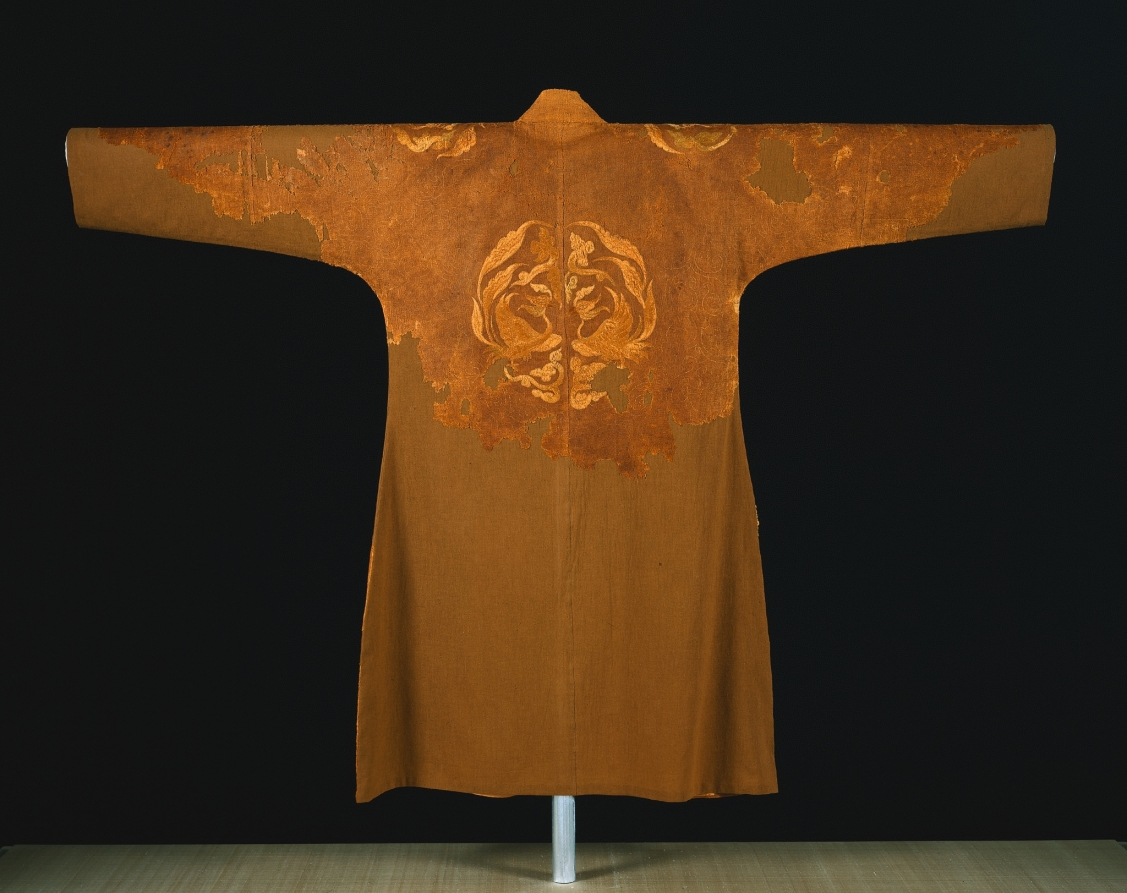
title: Woman's Robe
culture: China, Liao dynasty (907-1125)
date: 907–1125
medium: Silk and gold thread: embroidery on silk gauze ground; silk lining, silk batting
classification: Garment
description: The robe is embroidered on the back with clouds and paired phoenixes (associated with female members of the imperial family). Single phoenixes and clouds occur at the shoulders. On the front, fragments of another large pair of phoenixes remain. The birds and clouds are set against a scrolling vine pattern embroidered with gold thread, of which only the gold leaf remains. The design was drawn and then embroidered with silk and gold threads on lengths of fabric (gauze backed with silk) before they were cut and seamed. The robe was then lined with silk batting between the layers for warmth. Toward the end of the Liao dynasty, rules for wearing Khitan-style dress (overlapping toward the left) became increasingly relaxed. This may explain the robe's front overlap toward the right, which accords with Chinese custom.